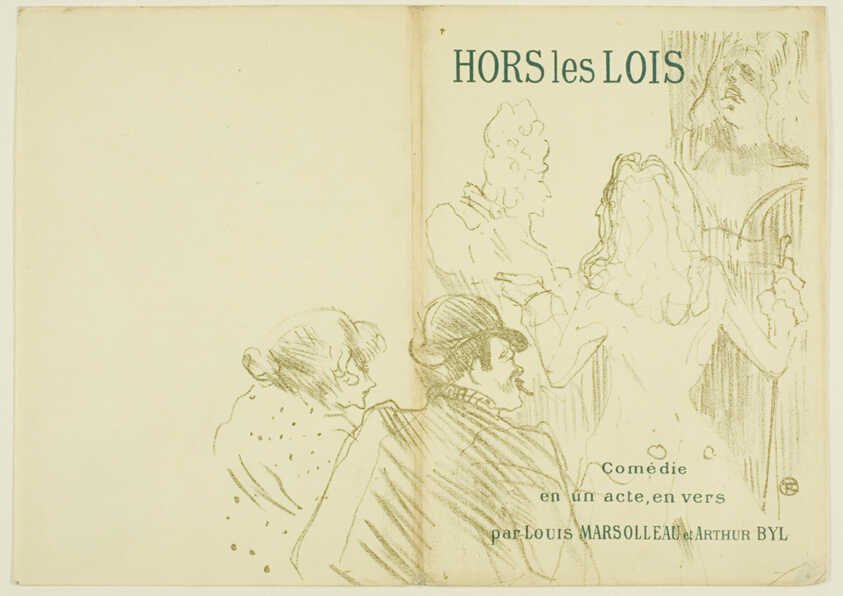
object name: Print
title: Homage to Molière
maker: Henri de Toulouse-Lautrec (French, 1864-1901)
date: 1897, published 1898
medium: Color lithograph on cream wove paper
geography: France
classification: lithograph; print; prints and drawing